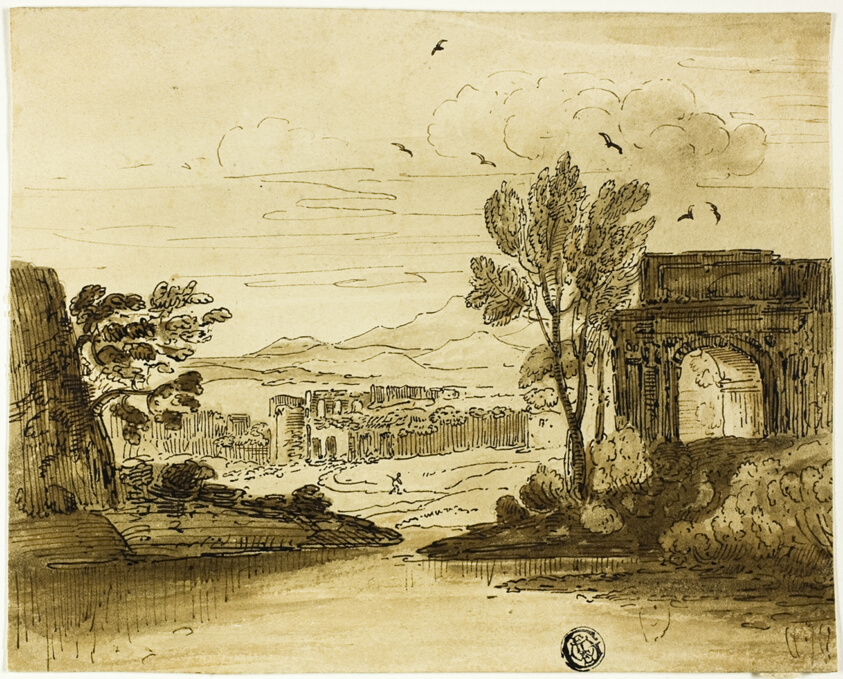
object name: Drawing and Watercolor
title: Landscape with Ruined Arch near Water, and Mountains in Distance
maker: Style of Giovanni Francesco Grimaldi (Italy, 1606-1680)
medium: Pen and brown ink, with brush and brown wash, over traces of graphite, on cream wove paper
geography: Italy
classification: ink or chalk wash; drawings (visual works); prints and drawing